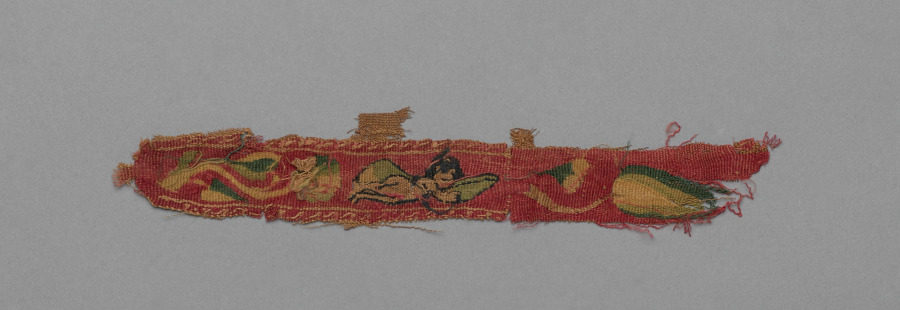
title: Fragment from a Tunic: Clavi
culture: Egypt, Umayyad period (661–750)?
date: 600s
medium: tabby weave, inwoven tapestry ornament; wool and linen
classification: Textile